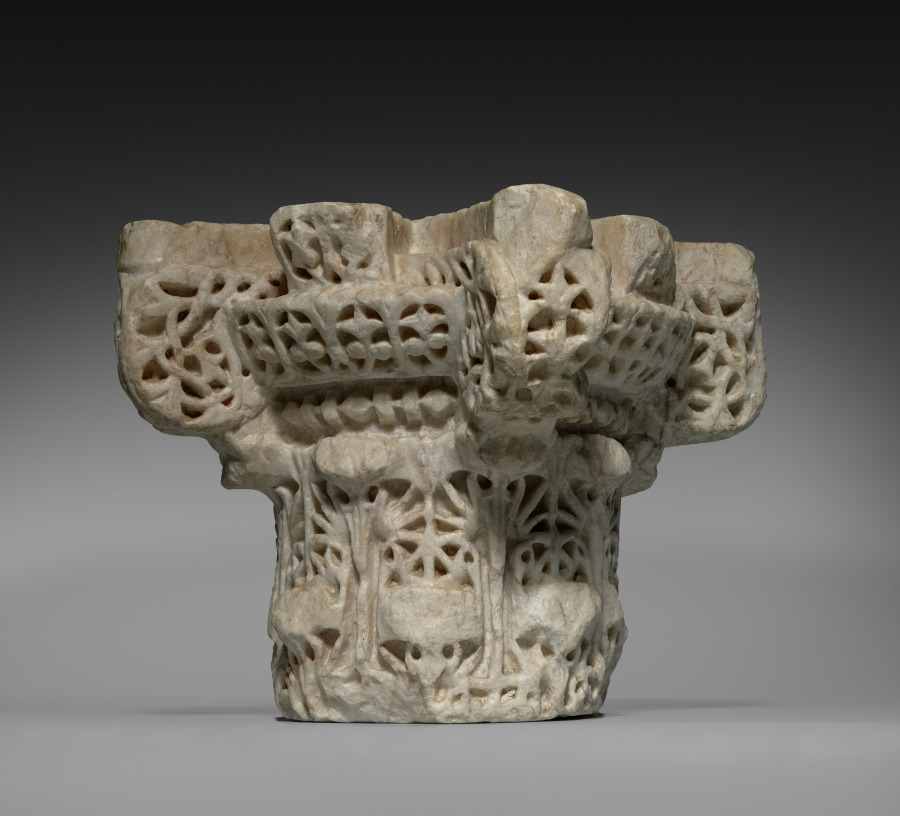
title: Column Capital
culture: Spain, Cordoba, Madinat al-Zahra, Spanish Umayyad period (756–1031)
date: c. 960–76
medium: Marble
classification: Sculpture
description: This capital comes from the palatial city of Madinat al-Zahra near Cordoba (Spain) which was begun by caliph Abd al-Rahman III (r. 912–61) around 936. Large parts of the Iberian Peninsula were then under Islamic rule and experienced a cultural flowering. The city, destroyed already in 1010, was the most magnificent palace complex in Europe at the time.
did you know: In the mid-1800s the ruins of Madinat al-Zahra were rediscovered and became the source of great fascination as people imagined a palace like that in the stories of One Thousand and One Nights.